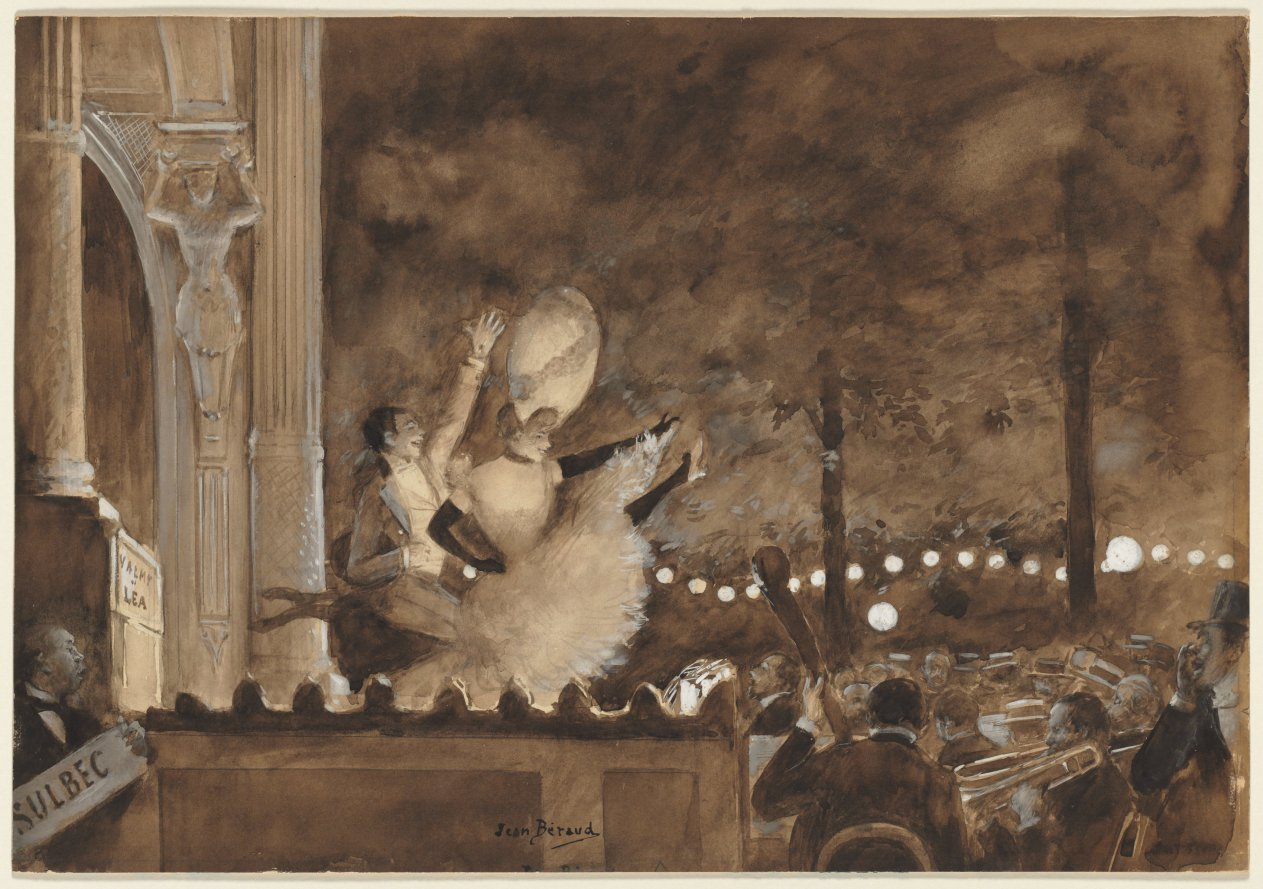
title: Valmy and Léa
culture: France, 20th century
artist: Jean Béraud (French, 1849–1935)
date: c. 1885–95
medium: brush and brown wash, heightened with white gouache, over graphite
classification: Drawing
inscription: lower center, in black ink: Jean Béraud / [fragments of an additional signature]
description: A forerunner to the cabaret, the café-concert was an irresistible subject for artists working in fin-de-siècle Paris. Here, the performers are illuminated by the unnatural glow of gas footlights, while the musicians in the orchestra, seen mostly from behind, are tucked in the shadowy foreground. The neck of the double bass extends above the crowd, drawing the viewer’s eye to the climactic cancan.